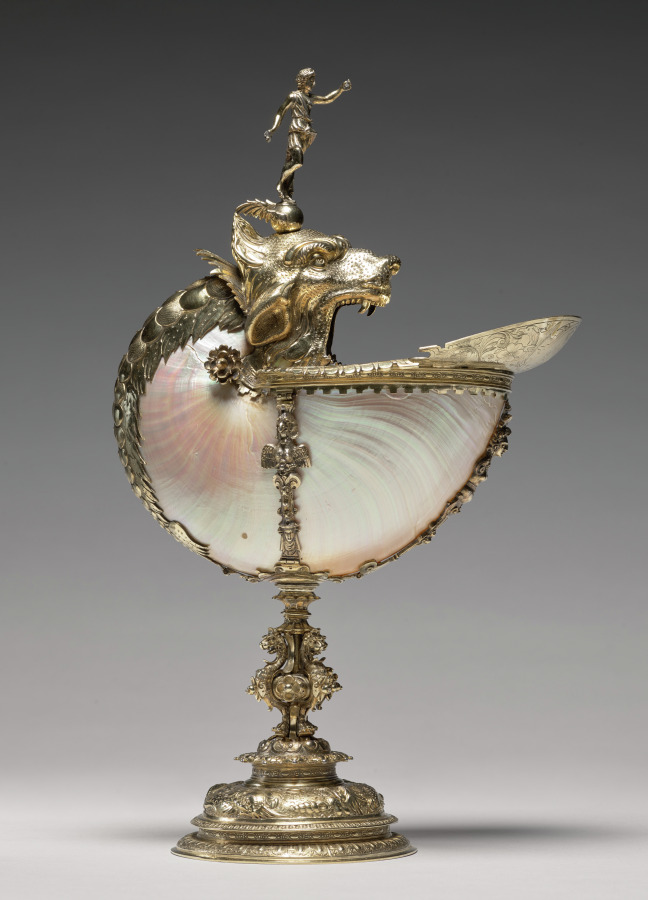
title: Nautilus Cup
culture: Netherlands, Holland, Delft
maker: Cornelis Jansz van der Burch (Dutch, active in Delft, d. 1615)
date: 1607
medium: Silver-gilt, nautilus shell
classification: Metalwork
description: Nautilus shells were brought to the Netherlands from Indonesia. Skilled Dutch silversmiths mounted them in silver, creating luxurious vessels that were sought after by wealthy collectors. Early Dutch nautilus cups are mainly associated with the city of Delft, although only a few other examples made in Delft are known from the late sixteenth and early seventeenth centuries. They feature the dramatic motif of a sea monster’s head.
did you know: The nautilus is a marine mollusk that swims by expelling water from its shell using jet propulsion.